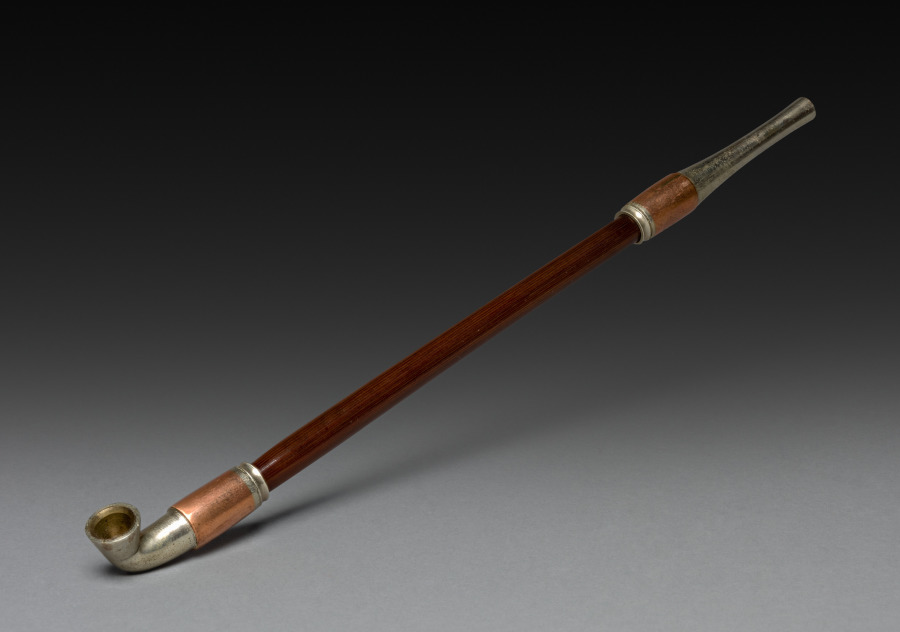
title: Tobacco Pipe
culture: Japan, Edo period (1615–1868)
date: early to mid-1800s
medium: wood, silver, brass, and copper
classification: Miscellaneous